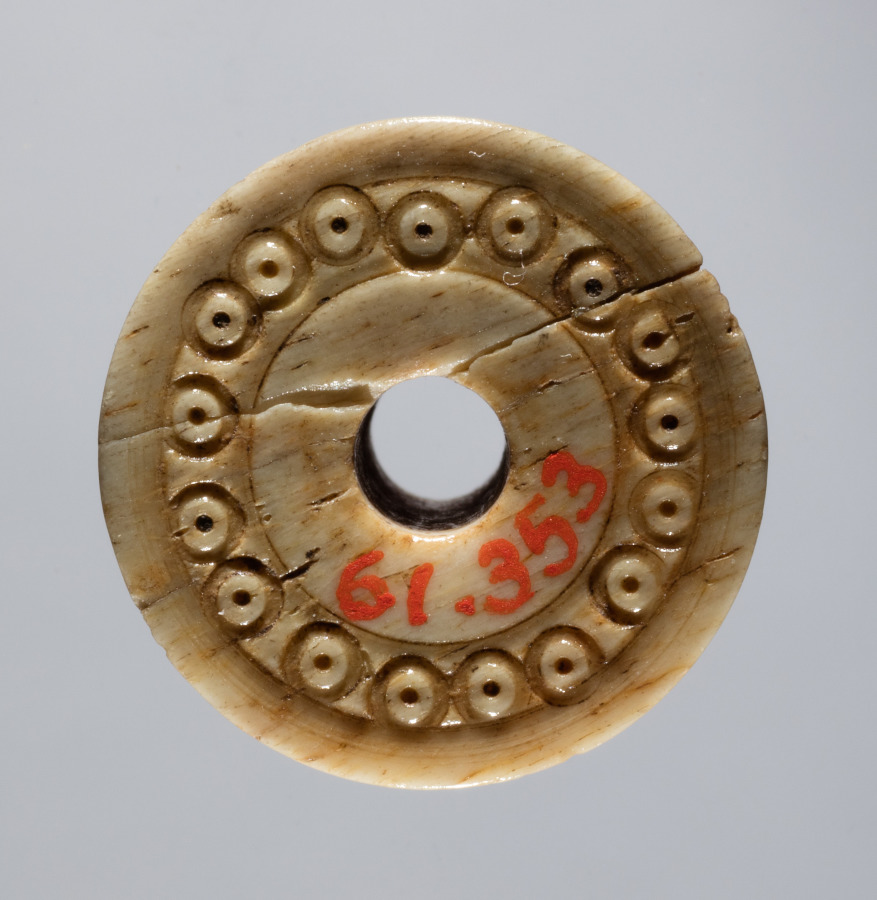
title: Spindle Whorl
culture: Iran, early Islamic period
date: 700s - 900s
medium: bone, incised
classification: Spindle Whorl